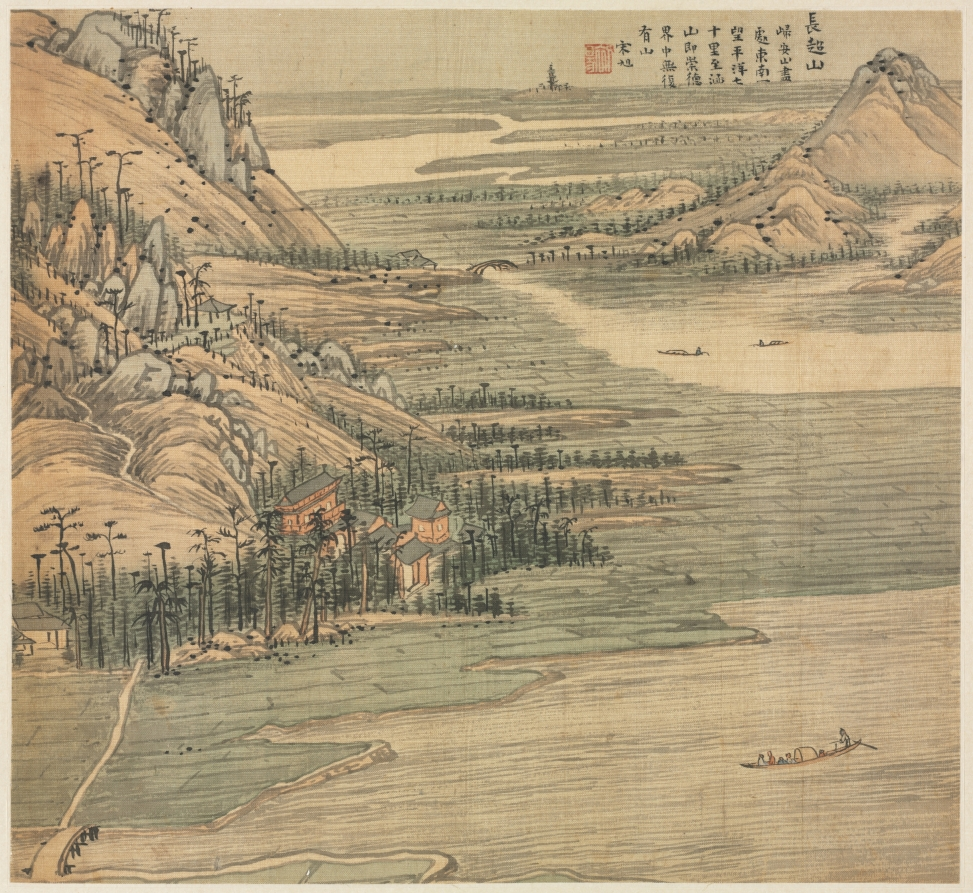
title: Mt. Changchao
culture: China, Jiaxing, Ming dynasty (1368–1644)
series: Eighteen Views of Huzhou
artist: Song Xu (Chinese, 1525-c. 1606)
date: c. 1588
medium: Album leaf; ink and color on silk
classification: Painting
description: By the 1500s, visits to historic and scenic sites in the lower Yangzi delta stimulated an increase of printed illustrated travel books. Topographical depictions of local scenery flourished. Leaves from this album illustrates sites around Lake Tai of the two adjacent counties Changxing and Wuxing (modern Huzhou). Song Xu, who lived intermittently in Jiaxing and Songjiang, must have passed through Wuxing by boat and thus knew the region. The paintings are inscribed with gazetteerlike notations, suggesting that the album was produced for clients as commemorative works, a travel guide, or for “armchair travel” (woyou) in one’s mind.